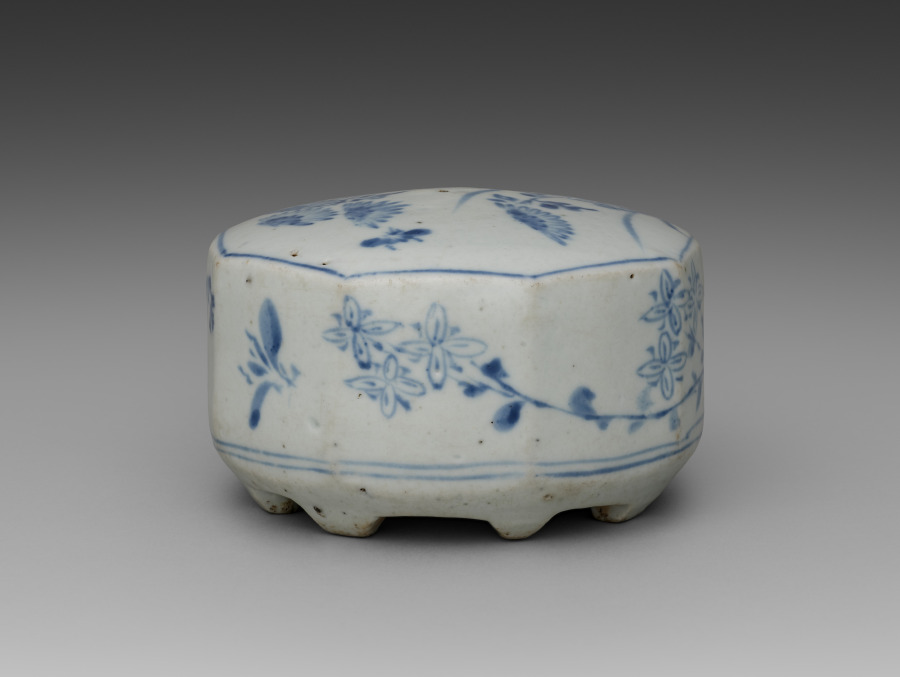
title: Octagonal Water Dropper Decorated with Flower Design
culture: Korea, Joseon dynasty (1392–1910)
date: late 1700s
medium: Porcelain with blue and white decoration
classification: Ceramic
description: A water dropper was an essential utensil for a literati man of the Joseon dynasty (1392–1910) in writing calligraphy. It was used to add water, by small drops, to an inkstone while grinding an ink stick. This work has a small spout in the shape of a cicada. This decorative element not only adds a sense of whimsical sensibility to this scholarly utensil, but also aims to symbolize the aspiration for scholarly achievement—as loud as the cicada’s song.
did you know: A small spout in the shape of a cicada is placed on one of the octagonal sides. This decorative element not only adds a sense of whimsical aesthetic sensibility to this scholarly utensil, but also aims to symbolize the aspiration for scholarly achievement—as loud as the cicada’s song.